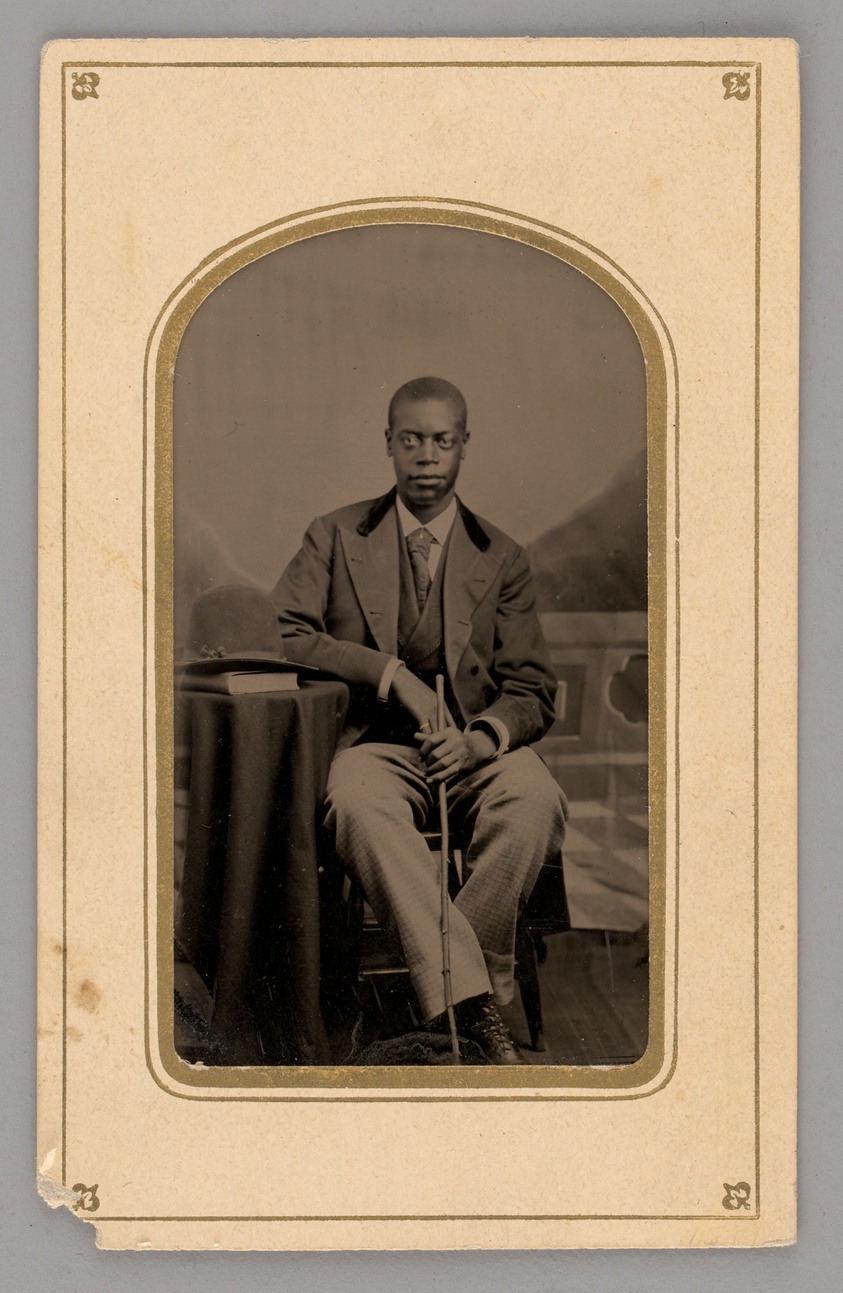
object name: Photograph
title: Untitled (Portrait of a Seated Man)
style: 19th century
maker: Unknown maker; American, 19th century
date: 1880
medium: Tintype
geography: United States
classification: portrait; tintype; photograph; photographic process; photography; portrait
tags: portraits: African American subject, portrait, men, Male, lundberg collection, African American, portraits